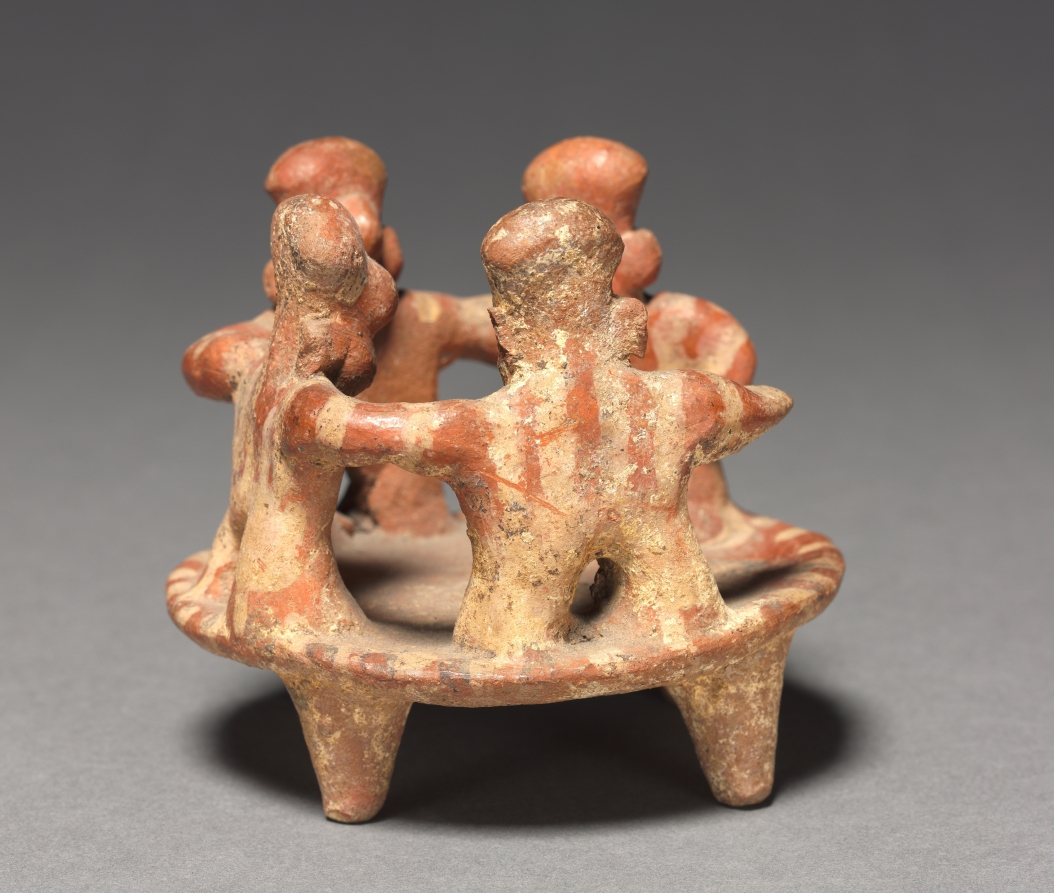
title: Dancing Group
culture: Mexico, Western Nyarit, 5th-6th Century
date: 400s-500s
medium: terracotta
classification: Sculpture